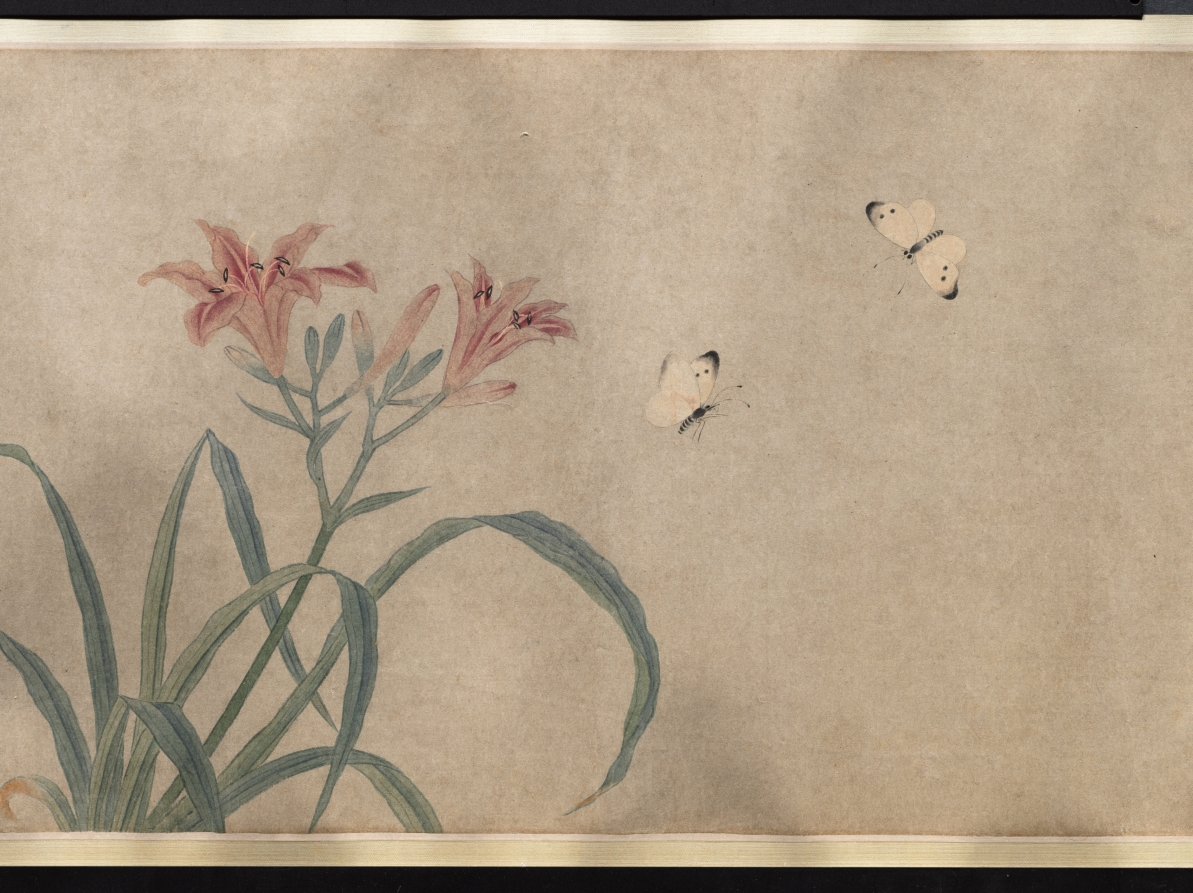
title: Insects and Flowers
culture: China, Qing dynasty (1644-1911) or Republican period (1912-49)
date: c. 1900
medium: Handscroll, ink and color on paper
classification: Painting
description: More than 26 feet long, this scroll presents insects, reptiles, and plants in delicate brushwork and pale colors, referring in style to earlier Southern Song dynasty (1127–1279) bird-and-flower paintings. Upon closer inspection, ants dismember a butterfly and reptiles wait to ambush their prey. An inscription at the end of the painting gives us an idea of its meaning: Attributed to the Qing dynasty scholar Zhang Xigeng (張錫庚, 1801–1861), the inscriber relates the work to an earlier painting by Qian Xuan (錢選, c. 1235–before 1307) and further suggests that the painting may allude to the relentlessness of natural selection. By drawing a parallel to tumultuous episodes in Chinese history, the writer might even hint at the domestic rebellions and the aggression of Western powers against China in his lifetime, particularly the Opium Wars (1839–60).